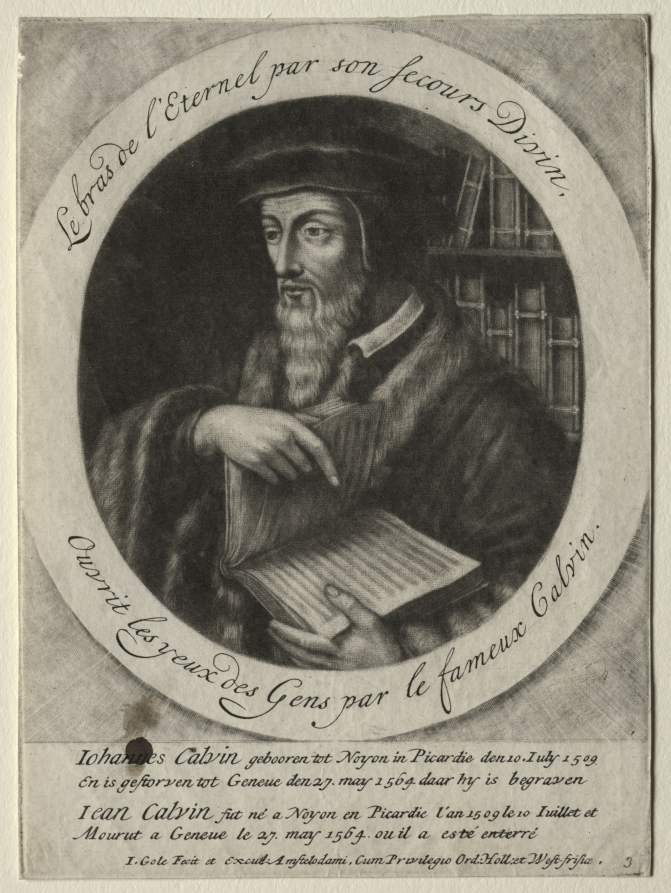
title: John Calvin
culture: Netherlands, late 17th-early 18th century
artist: Jacob Gole (Dutch, 1660–1737)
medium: mezzotint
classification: Print